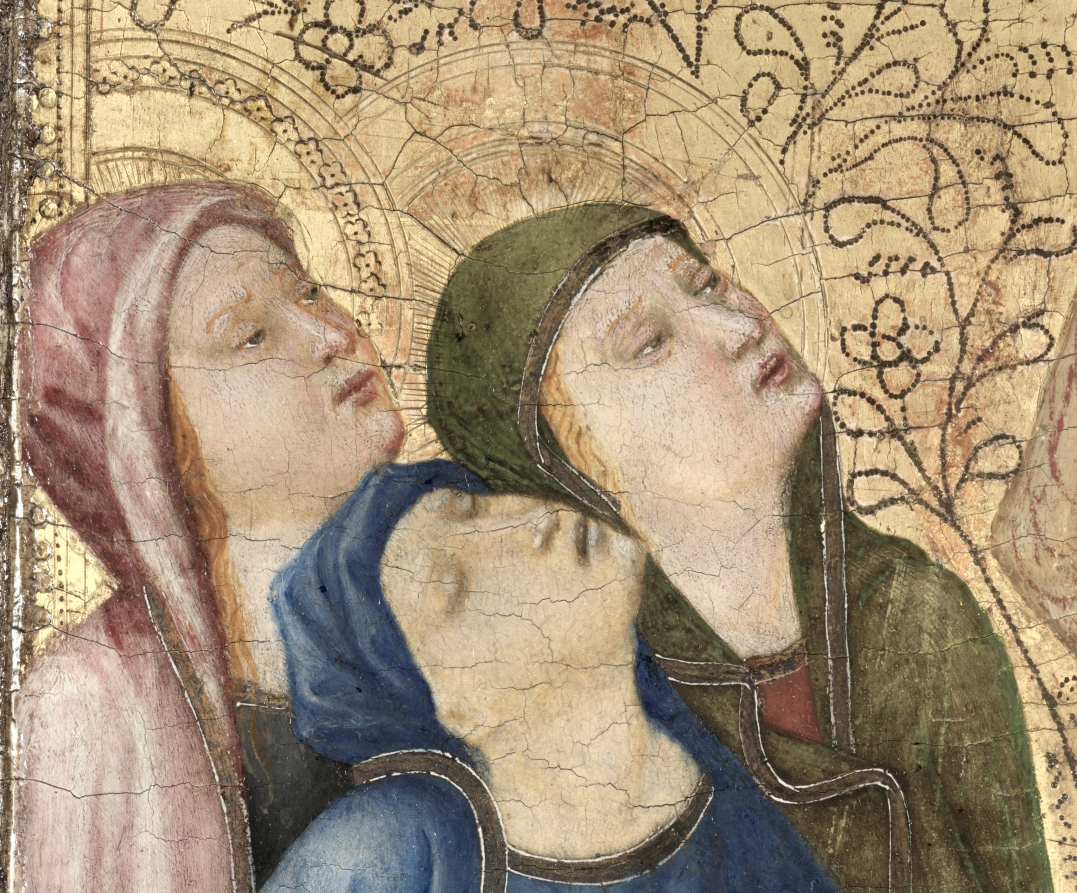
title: Calvary with a Carthusian Monk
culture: France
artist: Jean de Beaumetz (French, c. 1335–1396)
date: 1389–95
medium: oil on oak panel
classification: Painting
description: Jean de Beaumetz became the official court painter to the Burgundian duke, Philip the Bold, in 1376. Between 1389 and 1395 he created devotional paintings for the monks’ cells at the Chartreuse de Champmol, the monastery founded by Philip and his wife Margaret to house the ducal tombs. This panel, originally one of 26, is only one of two that have survived; the second is preserved in the Louvre in Paris. The Carthusians were intensely devoted to the Passion of Christ; particularly bloody images of the Crucifixion often decorated their cells. Isolated from one another, the monks contemplated the sacrifice of Christ (emphasized here by the presence of a Carthusian monk at the foot of the cross) creating an empathetic connection with the suffering of the Virgin who faints in the arms of the two Marys. Saint John the Evangelist, on the right, bows his head in sorrow. The punched decoration in the gold background represents the Trees of Life and Knowledge, emphasizing the biblical connection between Adam and Christ.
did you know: Records exist detailing the delivery of the this panel and 25 others to the monastery Chartreuse de Champmol, for use in the monks' cells.